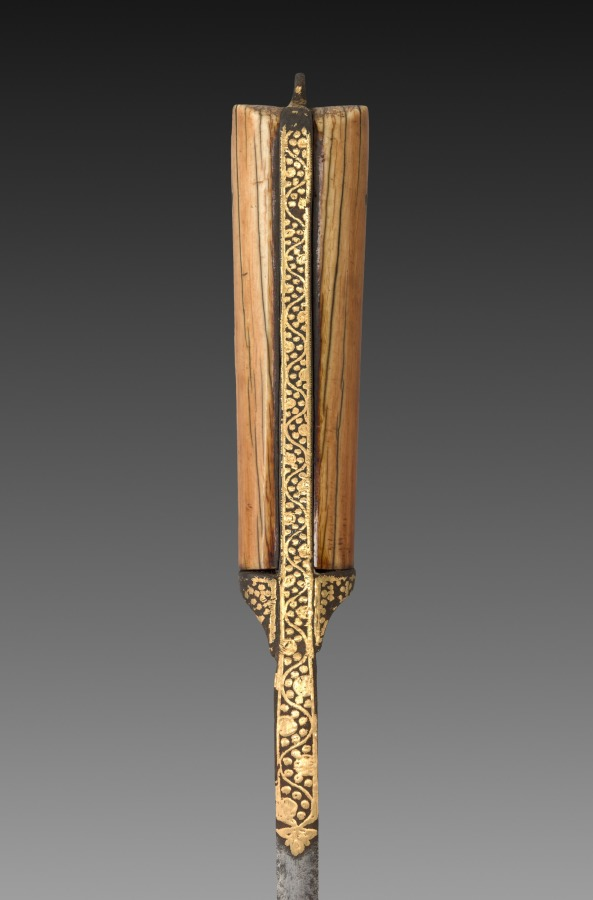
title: Dagger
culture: India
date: 1700s–1800s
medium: silver inlay and leather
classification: Arms and Armor